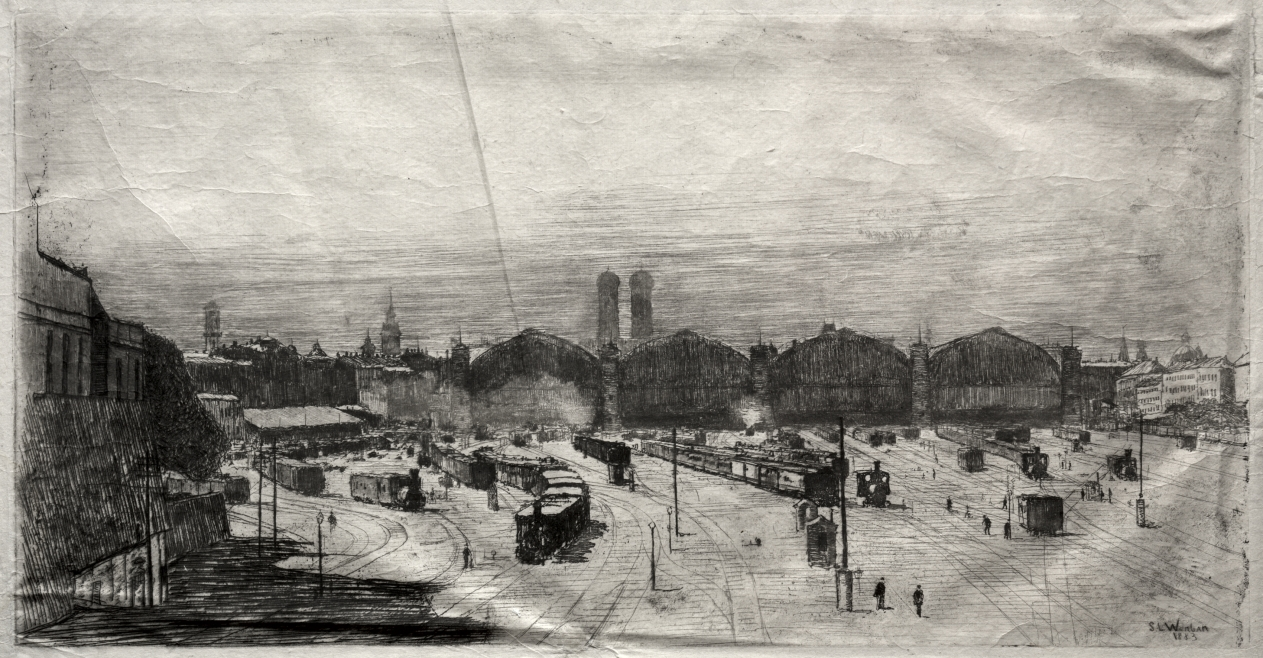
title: Railroad Station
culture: America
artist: Sion Longley Wenban (American, 1848–1897)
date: 1883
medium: etching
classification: Print